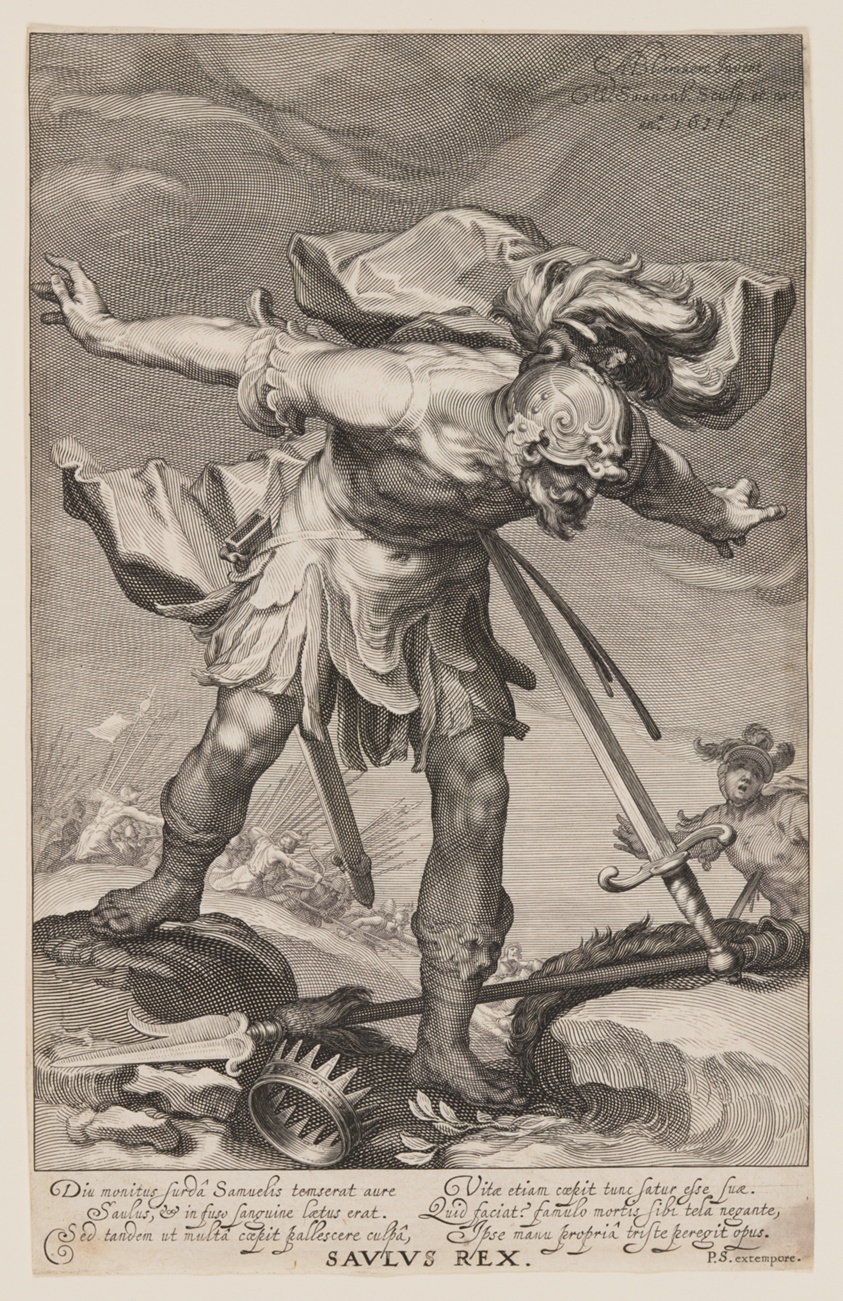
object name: Print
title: Saulus Rex, from Sinners of the Old and New Testament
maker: Willem van Swanenburgh (Dutch, 1580–1612); after Abraham Bloemaert (Dutch, 1566–1651)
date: 1611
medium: Engraving on ivory laid paper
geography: Netherlands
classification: engraving; paper; print; prints and drawing